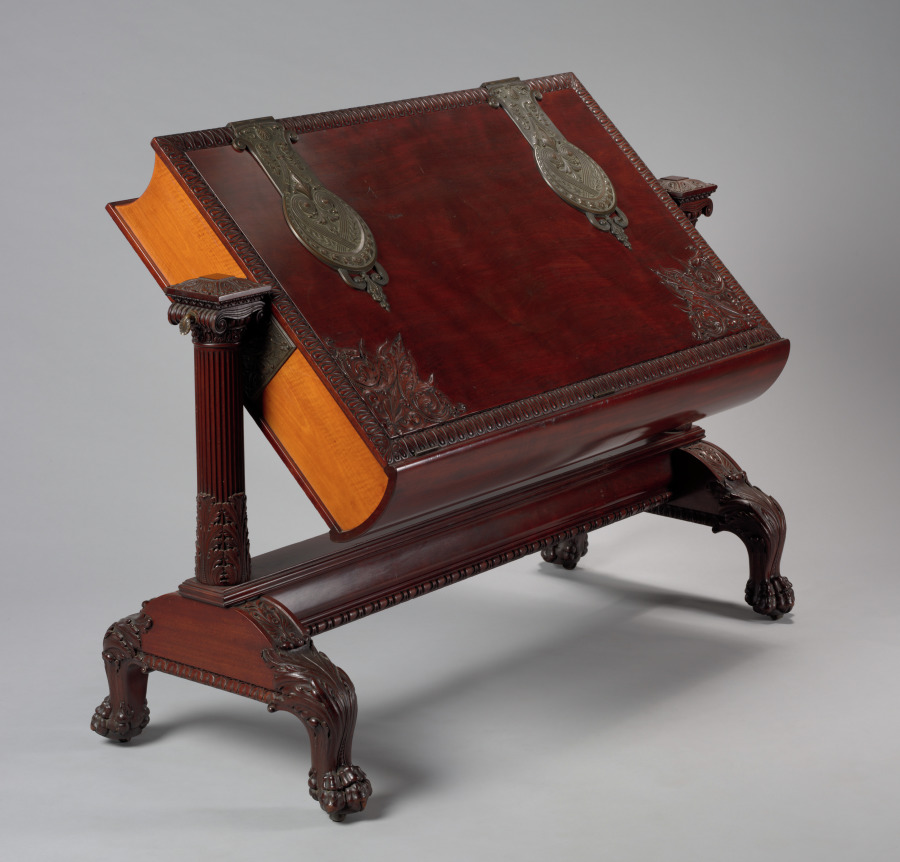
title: Map/Print Case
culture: America, probably New York City, 19th century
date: late 1800s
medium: mahogany and maple with bronze hardware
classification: Furniture and woodwork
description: This unusual piece of furniture was perhaps intended to house musical manuscripts, since lyres are included in the decoration of its hinges. It was probably made in the 1880s, when classicism was exerting itself in American architecture and the related art of furniture design.